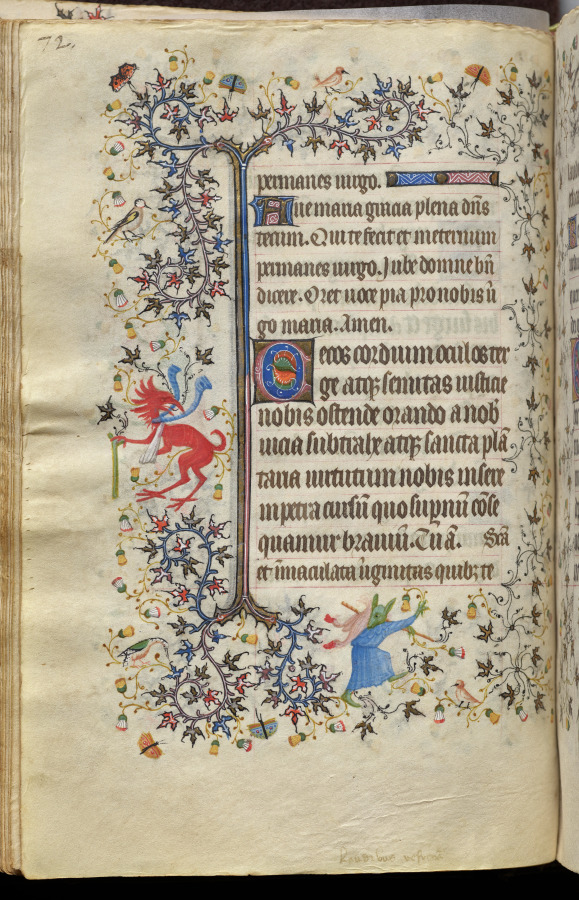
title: Hours of Charles the Noble, King of Navarre (1361-1425): fol. 36v, Text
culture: France, Paris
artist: Master of the Brussels Initials and Associates (French)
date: c. 1405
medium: ink, tempera, and gold on vellum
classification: Bound Volume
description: This precious volume was obviously highly prized by its owner, the French-born King of Navarre, who had his coat of arms painted on no less than twenty folios. Rather than directly commissioning this manuscript from a specific workshop, it seems that Charles the Noble acquired his book of hours -- perhaps ready-made for the luxury market -- while on a trip to Paris in 1404-05. A collaborative effort, six painting styles are evidenced within the pages of this codex, those of two Italians, two Frenchmen, and two Netherlanders. The painter who was responsible for the planning and decoration of the book, and who produced seventeen of the large miniatures, was a Bolognese artist known as the Master of the Brussels Initials. His principal assistant, responsible for most of the borders, was a Florentine who signed his name "Zecho" da Firenze on folio 208 verso.